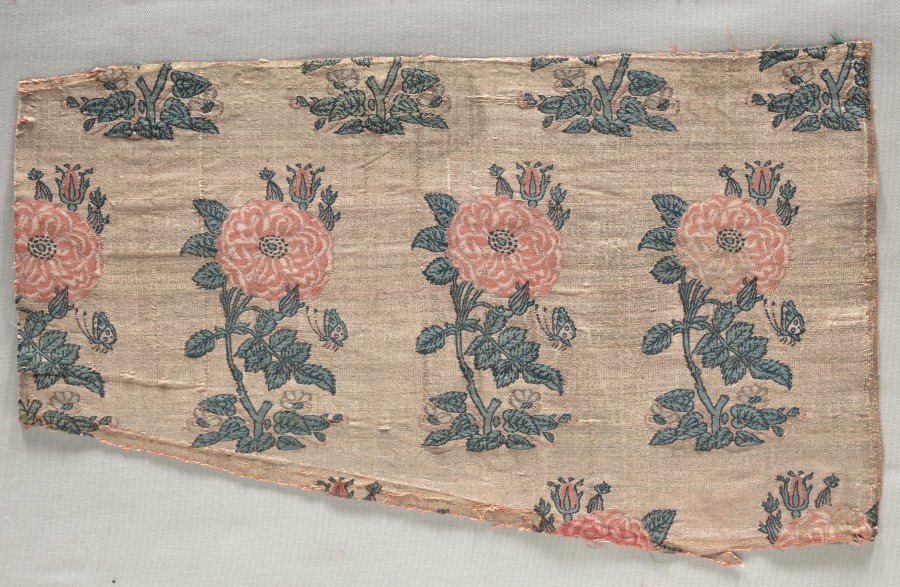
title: Sleeve with rose bushes and butterflies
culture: Iran, Safavid period (1501–1722)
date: early 1600s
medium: silk and gilt-metal thread: taqueté ground with twill pattern, brocaded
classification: Textile